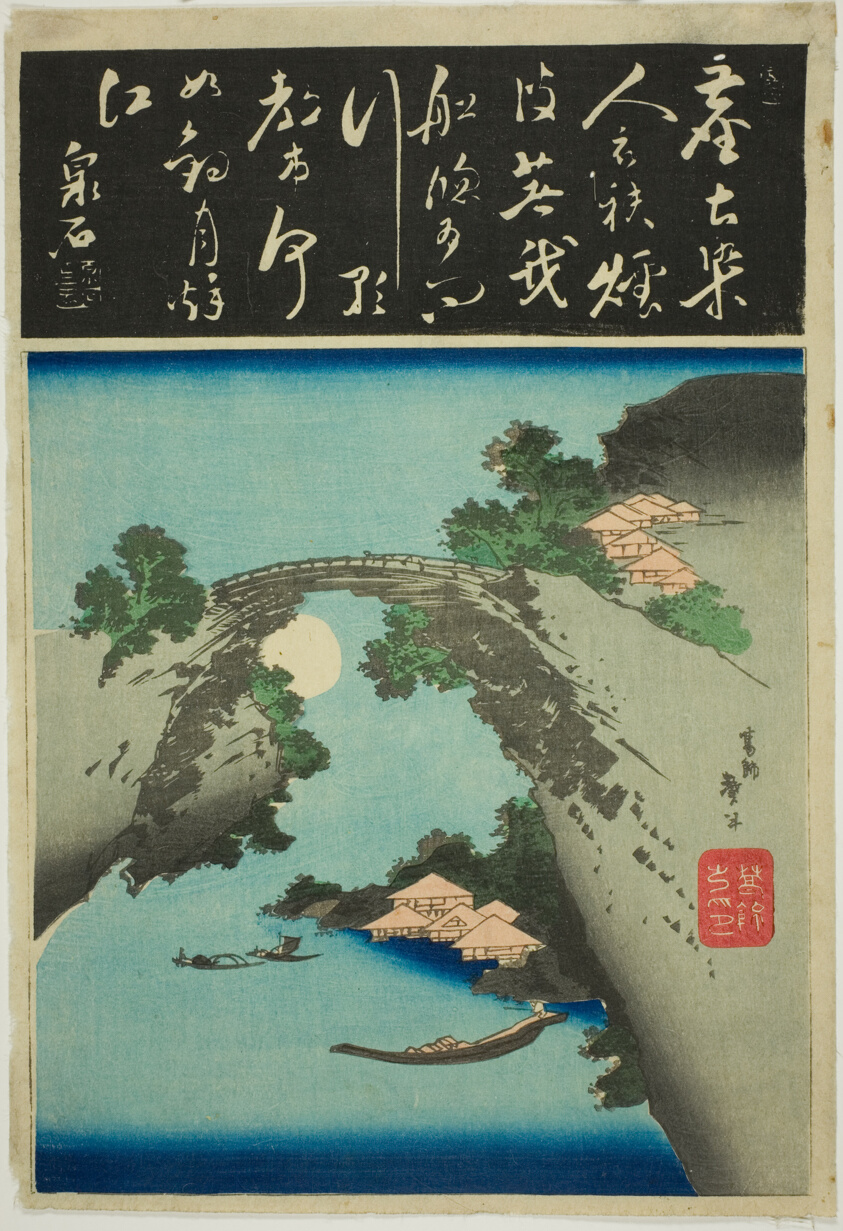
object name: Print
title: Monkey bridge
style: Japanese (culture or style)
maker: Katsushika Taito II (Japanese, active c. 1810–53)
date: c. 1830/44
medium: Color woodblock print; oban, harimaze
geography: Japan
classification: woodblock print; print; asian art